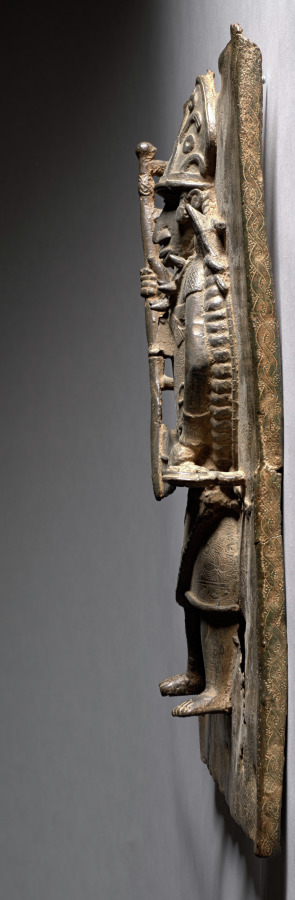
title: Plaque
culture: Nigeria, Benin Kingdom, Ẹdo peoples, members of the Igun Eronmwon (royal brasscasters) guild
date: 1500s–1600s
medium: Copper alloy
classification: Sculpture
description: Craftsmen modeled brass plaques like this in wax before casting them with hot metal. Molds pushed out figures’ general shapes, then details—such as this warrior’s staff and court sword (ẹbẹn)—were added by hand. Reflecting Benin’s global connections, the incised flowers may have Islamic or European origins. Called ebe-amẹn (river leaves) they are identified with Olókun, god of the waters. The interlaced side motifs may connect several early plaques also linked by topic and style. The palace plaques were in storage before the 1897 Siege of Benin. Recently, an art historian virtually reconstructed their former display in the palace based on their dimensions and imagery.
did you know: The bent sides of this plaque once helped attach it to wooden beams in a palace.